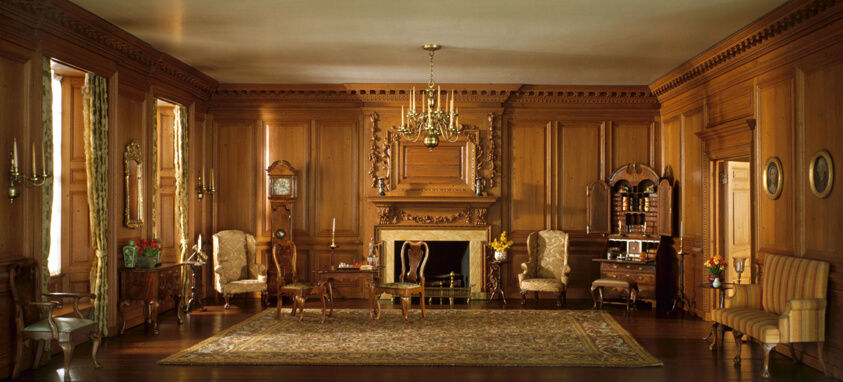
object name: Miniature room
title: A5: Massachusetts Drawing Room, 1768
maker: Designed by Narcissa Niblack Thorne; American, 1882-1966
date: c. 1940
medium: Miniature room, mixed media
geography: United States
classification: thorne rooms; miniature